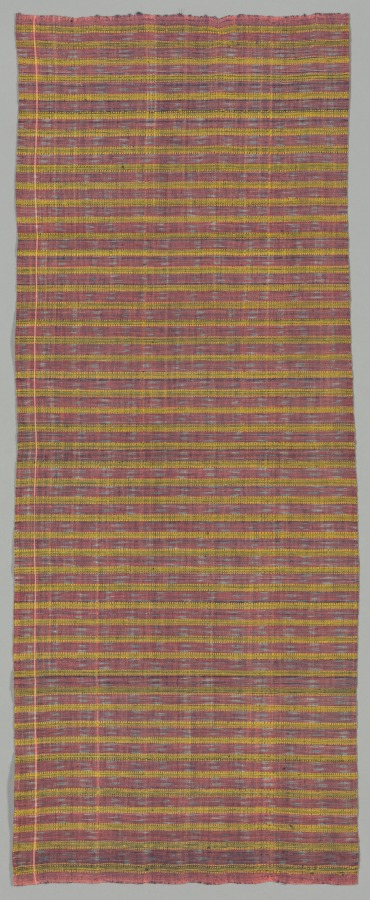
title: Fragment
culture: India, late 19th century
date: late 1800s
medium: silk and cotton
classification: Textile